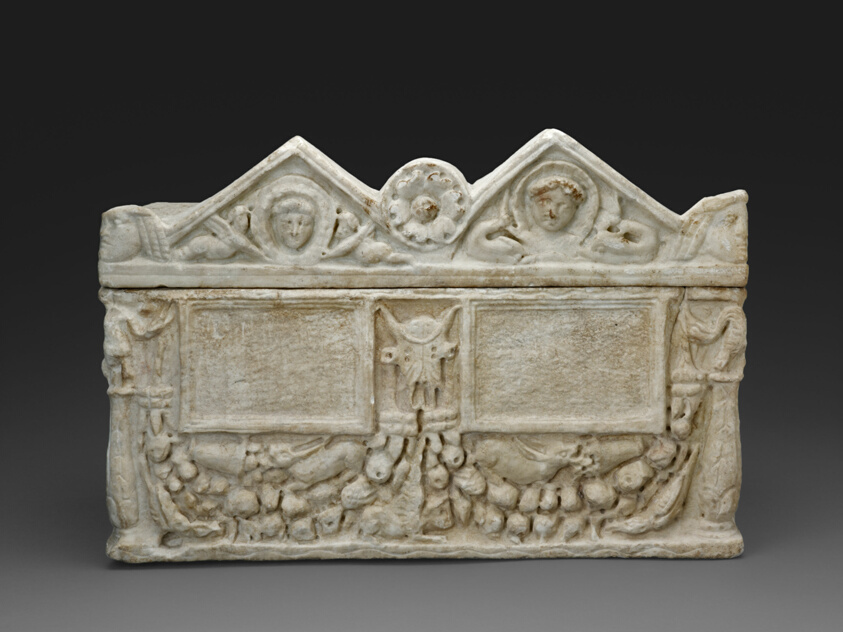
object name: Funerary Object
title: Cinerary Urn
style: roman (ancient, style or period), ancient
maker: Roman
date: Late 1st-early 2nd century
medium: Marble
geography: Roman Empire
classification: stone; sculpture; ancient art